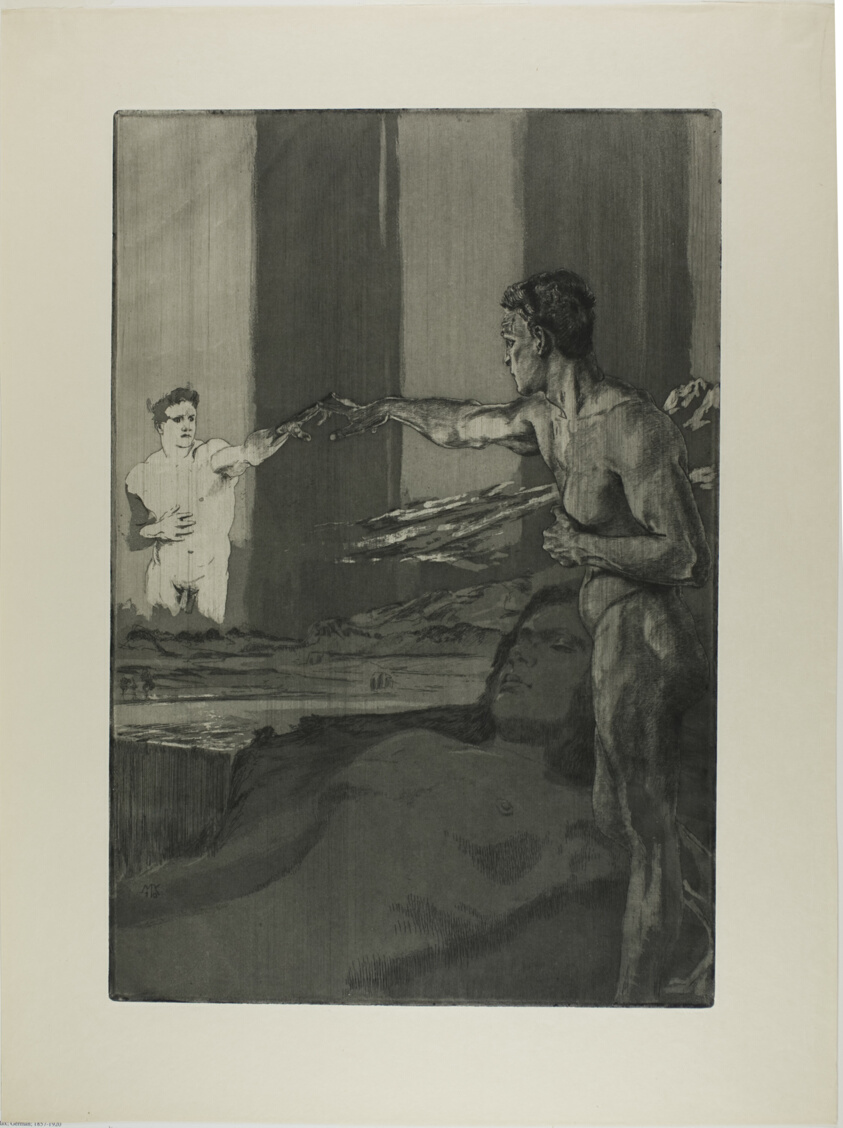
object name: Print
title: Philosopher, plate three from One Death, Part II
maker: Max Klinger (German, 1857-1920)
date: c. 1889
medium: Etching and aquatint on dark cream wove paper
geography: Germany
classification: etching; print; prints and drawing